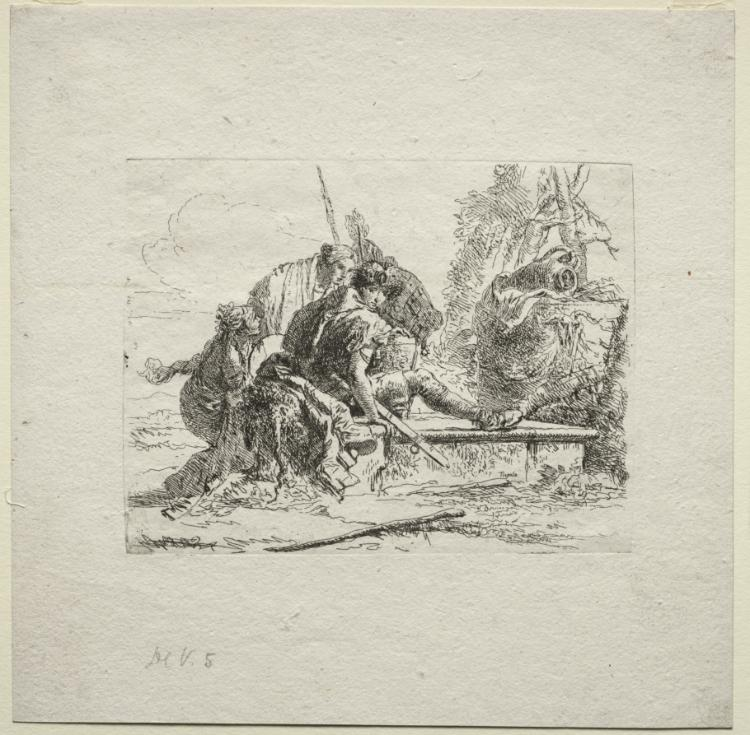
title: Various Caprices: The Two Soldiers and the Two Women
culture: Italy, 18th century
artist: Giovanni Battista Tiepolo (Italian, 1696–1770)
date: 1735–50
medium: etching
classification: Print